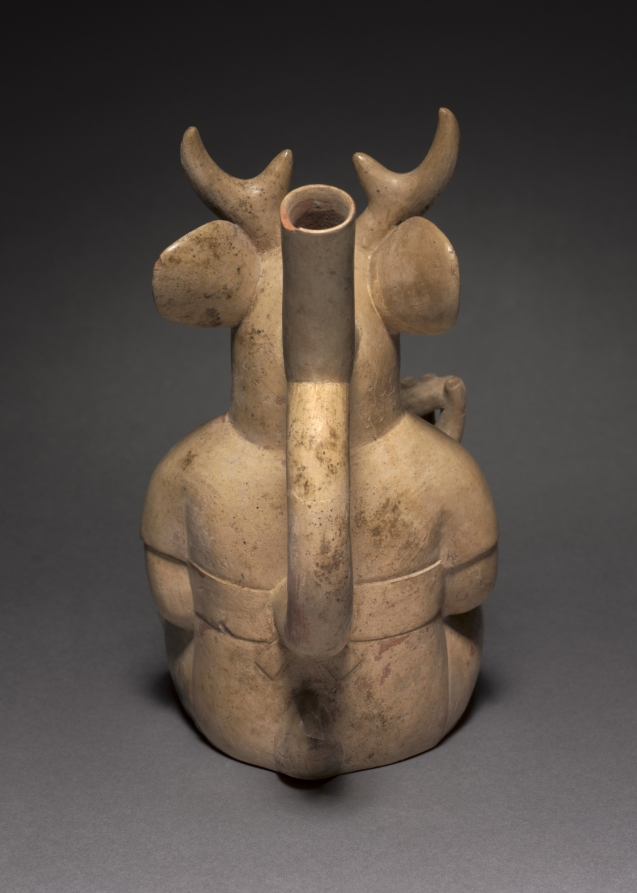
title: Deer-Headed Figure Vessel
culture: Central Andes, North Coast, Moche people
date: 200–850 CE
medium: ceramic, slip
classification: Vessels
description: Moche imagery includes an intriguing world of creatures that mingle traits from different realms: beans sprout human legs and race up a spout, jars leap with human feet to pour themselves, and animals wield weapons in two hands. This figure, with a stag’s head but a human’s body, is an example. He is engaged in a coca-leaf chewing ritual and thus holds a bag for the leaves along with a container of powdered lime that is one of the ritual’s key ingredients.